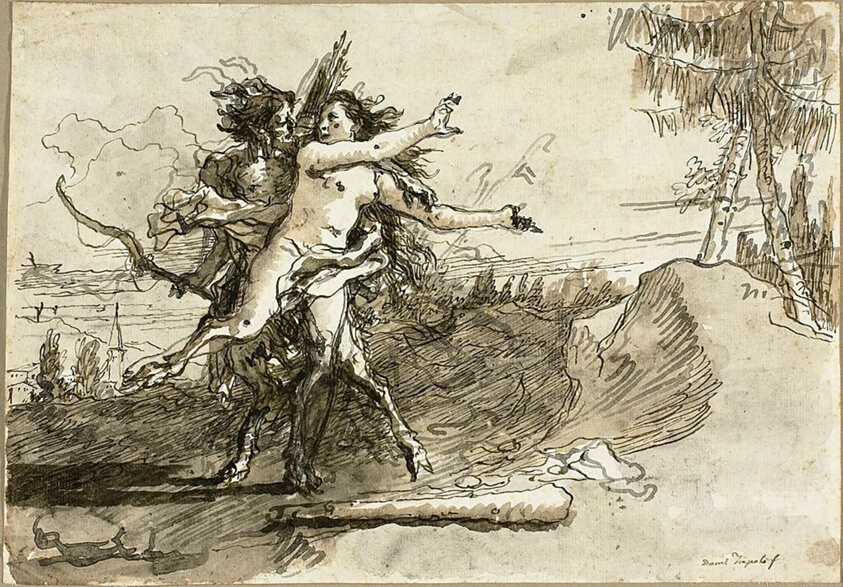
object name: Drawing and Watercolor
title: Satyr Surprising a Satyress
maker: Giovanni Domenico Tiepolo (Italian, 1727-1804)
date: 1759/91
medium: Pen and brown and black ink, brush and brown and gray wash, on ivory laid paper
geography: Italy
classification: ink or chalk wash; drawings (visual works); prints and drawing